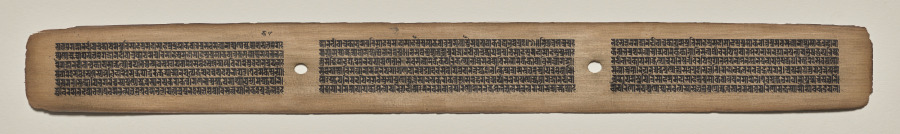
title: Text, Folio 56 (recto), from a Manuscript of the Perfection of Wisdom in Eight Thousand Lines (Ashtasahasrika Prajnaparamita-sutra)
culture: Eastern India, Bihar, Vikramashila Monastery. Painting: Nepal, Kathmandu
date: Sunday, September 14, 1119 (year 239 of the Newar Samvat in the month of Ashvina)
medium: gum tempera and ink on palm leaves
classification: Painting